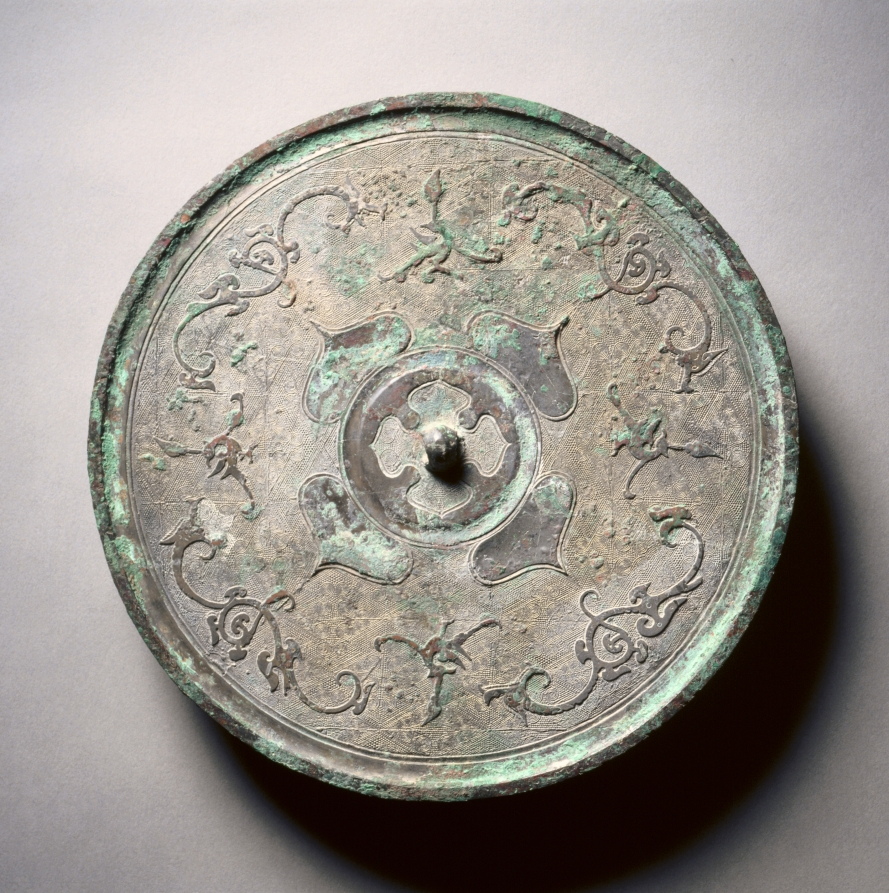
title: Mirror with Double Quatrefoils, Dragons, and Phoenixes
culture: China, Eastern Zhou dynasty (770–256 BCE), Warring States period (475–221 BCE)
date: 200s BCE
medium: bronze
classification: Metalwork